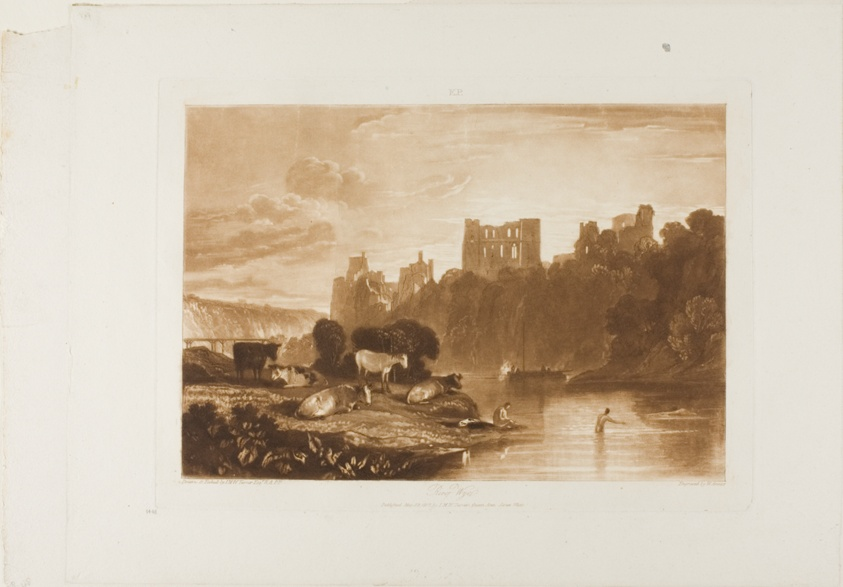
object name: Print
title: River Wye, plate 48 from Liber Studiorum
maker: Joseph Mallord William Turner (English, 1775-1851); Engraved by W. Anis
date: published May 23, 1812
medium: Mixed intaglio in brown ink on ivory wove paper, laid with chine collé on ivory wove paper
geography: England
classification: etching; print; prints and drawing